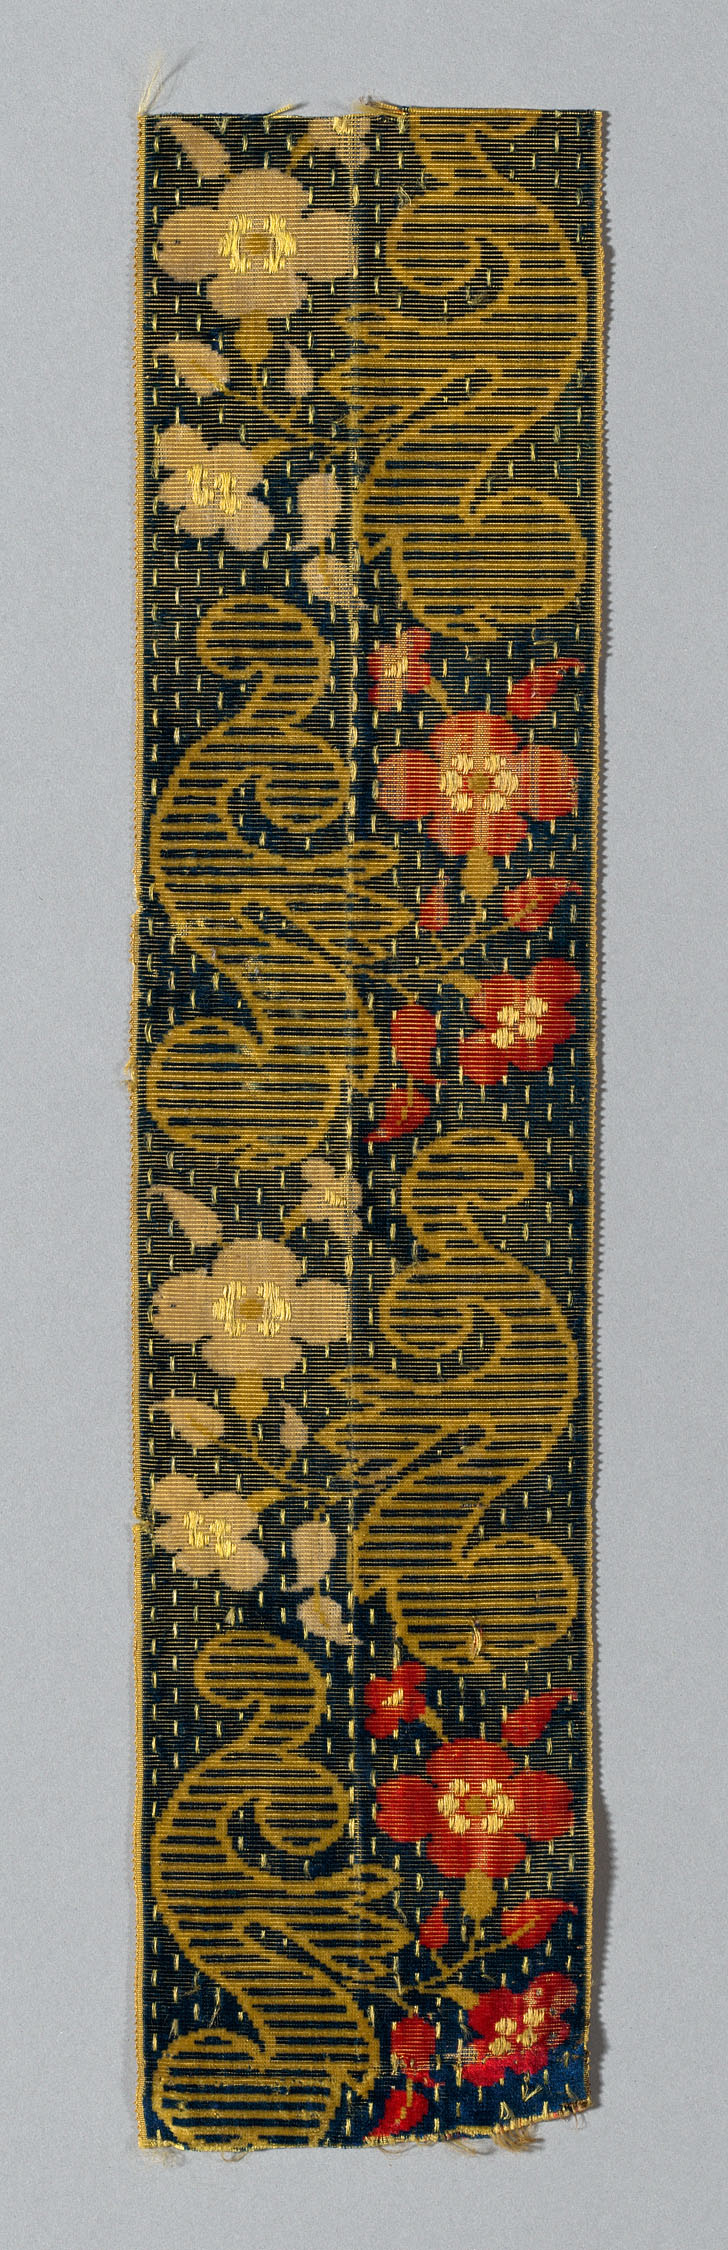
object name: Textile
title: Ribbon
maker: France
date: 19th century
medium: Silk, plain weave with supplementary patterning warp and supplementary three-color pile warps forming cut solid velvet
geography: France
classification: textile; weaving - velvet